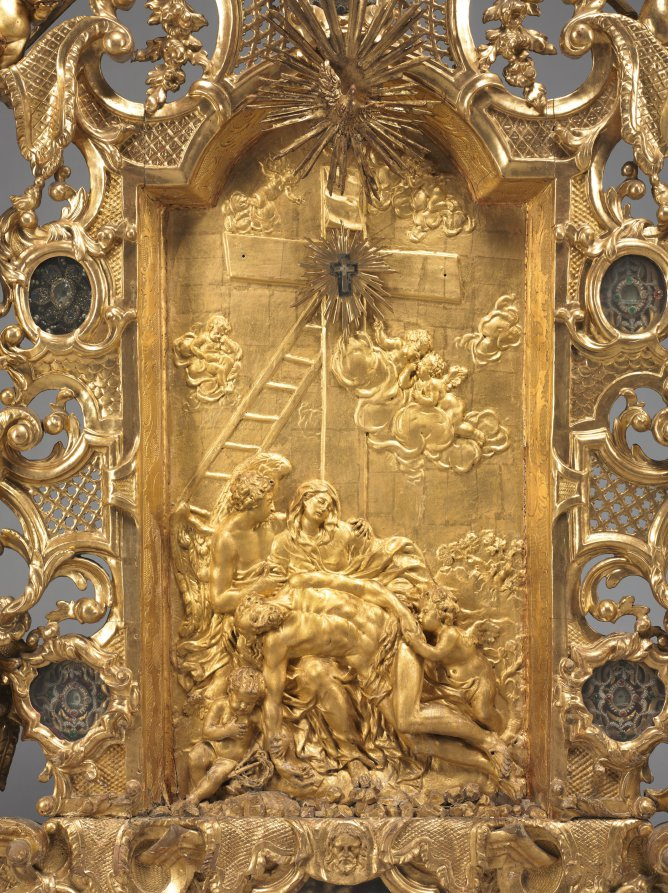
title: Altarpiece with Relics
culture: Germany, Bavaria, 18th century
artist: Joseph Matthias Götz (German, 1696–1760)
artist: and Workshop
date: c. 1735–40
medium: gilded wood, with relics in niches: gilded wood, mother-of-pearl, ebony, red silk, gold wire, seed pearls, rock crystal, pen and ink on paper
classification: Sculpture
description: Götz covers every surface in gold leaf, giving each part of the object equal importance, rather than simply framing a central picture. In this distinctively Central European approach, figural narrative is subordinate to the overall ensemble. Götz designed this object to rest on top of an altar, probably in front of a larger painted or sculpted decorative scheme. The work contains relics seen through the small windows on the perimeter. These small remains of holy figures demonstrate the persistence of a medieval Catholic tradition well into the 1700s.